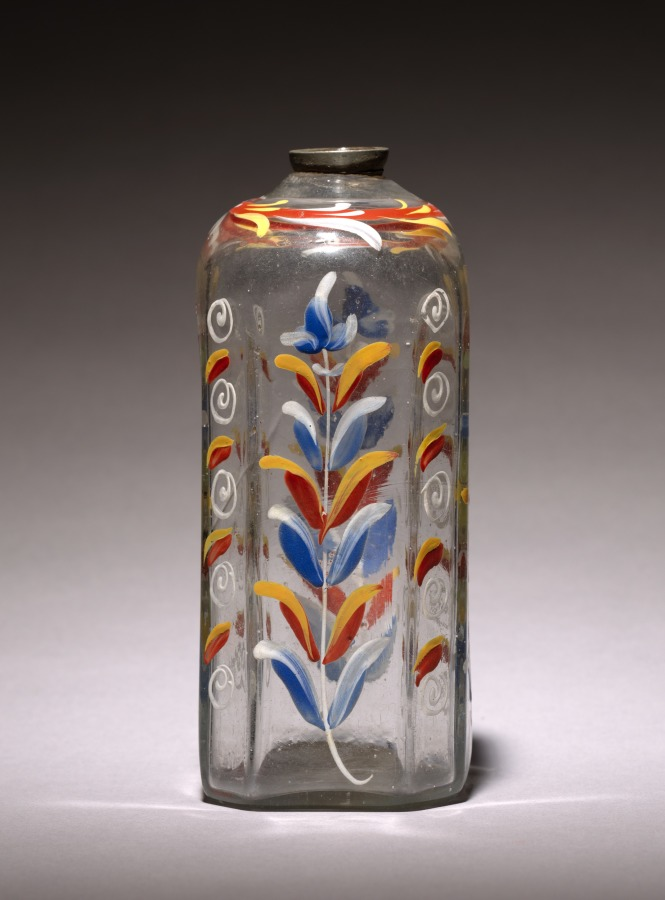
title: Enameled Bottle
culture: America, Stiegel Type, 18th century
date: 1700s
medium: glass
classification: Glass